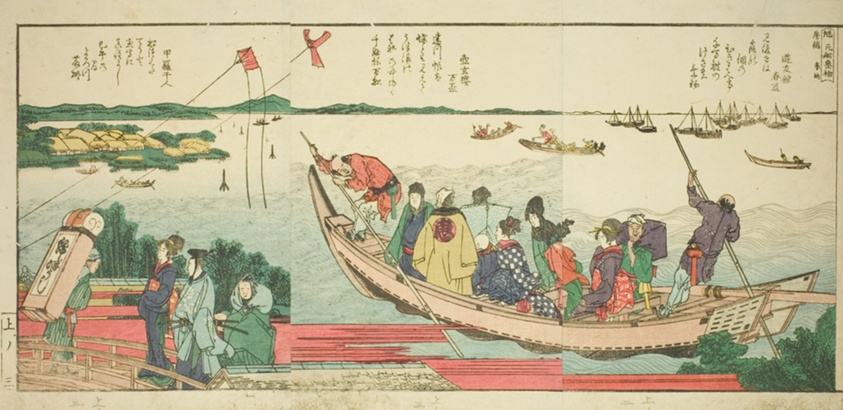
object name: Print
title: Pages from the illustrated book "Panoramic Views along the Banks of the Sumida River (Ehon Sumidagawa ryogan ichiran)"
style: Japanese (culture or style)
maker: Katsushika Hokusai 葛飾 北斎; Japanese, 1760-1849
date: 1801, 1804, or 1806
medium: Color woodblock print; 3 pages from illustrated book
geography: Japan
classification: woodblock print; print; asian art